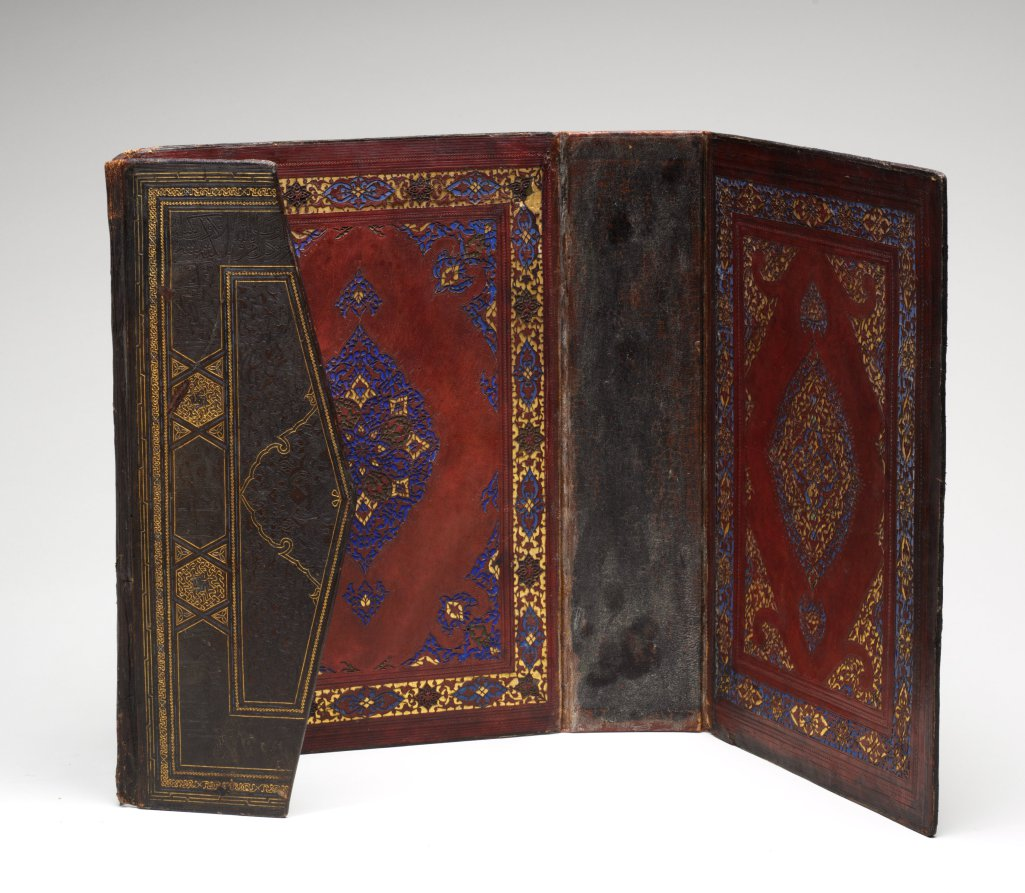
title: Bookbinding for a Qur'an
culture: Turkey, Istanbul, Ottoman period, 15th century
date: 1460–1500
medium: leather over paper pasteboards; outer cover tooled, blue paint; inner covers openwork designs over colored papers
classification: Book Binding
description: Islamic book covers generally have a triangular flap attached to the rear cover of the binding which is tucked under the front cover to protect the outside edge of the pages. The outer covers of this particularly elaborate example feature panels with Qur'anic inscriptions, interlace patterns, and a central medallion filled with floral and arabesque designs. The inner covers offer a superb example of leather openwork, a leather technique that originated in northeastern Iran in the 1400s.